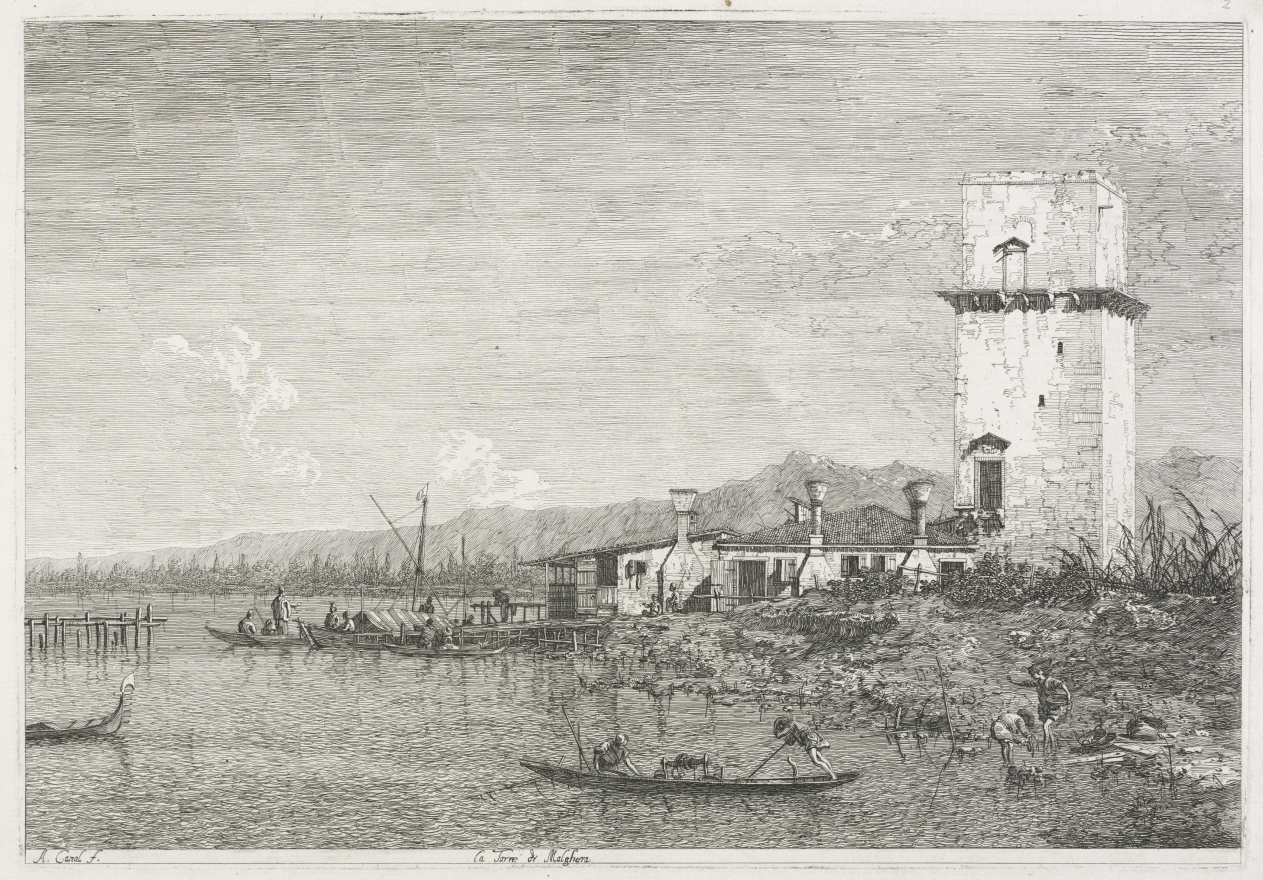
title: Views: The Tower of Malghera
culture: Italy, Venice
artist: Antonio Canaletto (Italian, 1697–1768)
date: 1735–1746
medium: etching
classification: Print